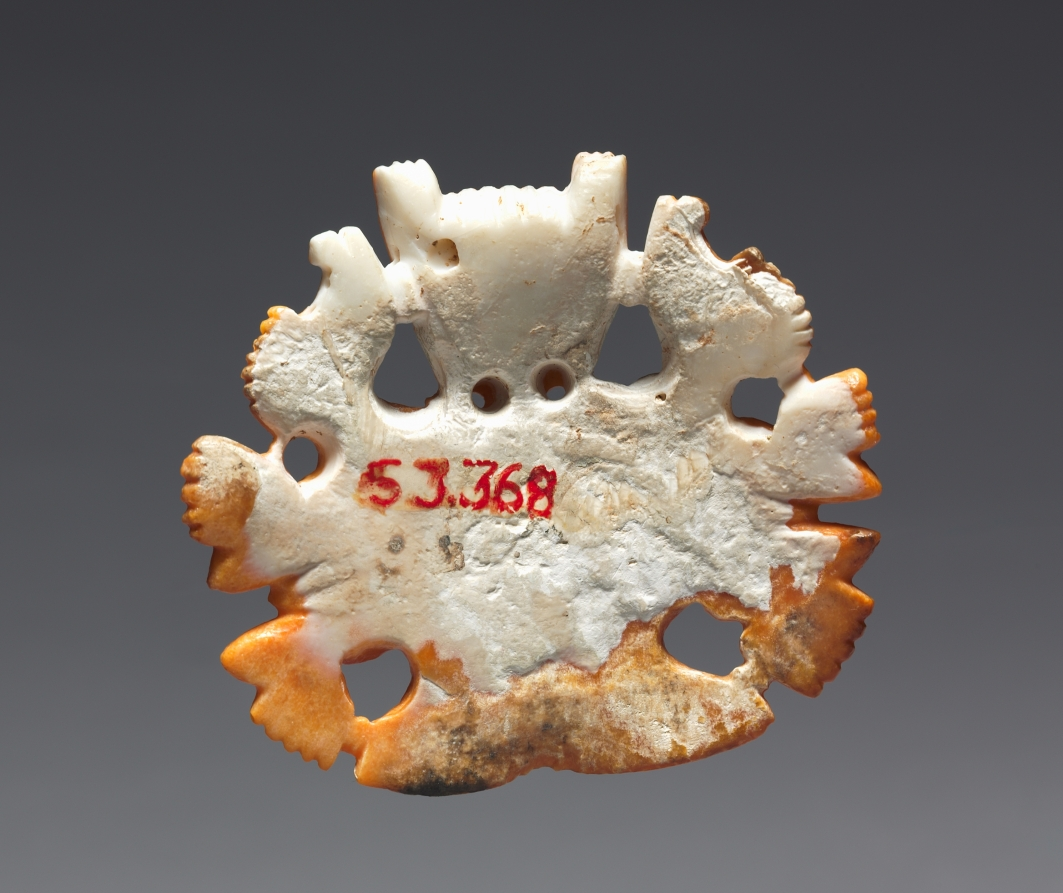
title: Figure-and-Birds Pendant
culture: Costa Rica, Atlantic Watershed region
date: c. 300–700 CE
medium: spondylus (thorny oyster) shell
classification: Jewelry